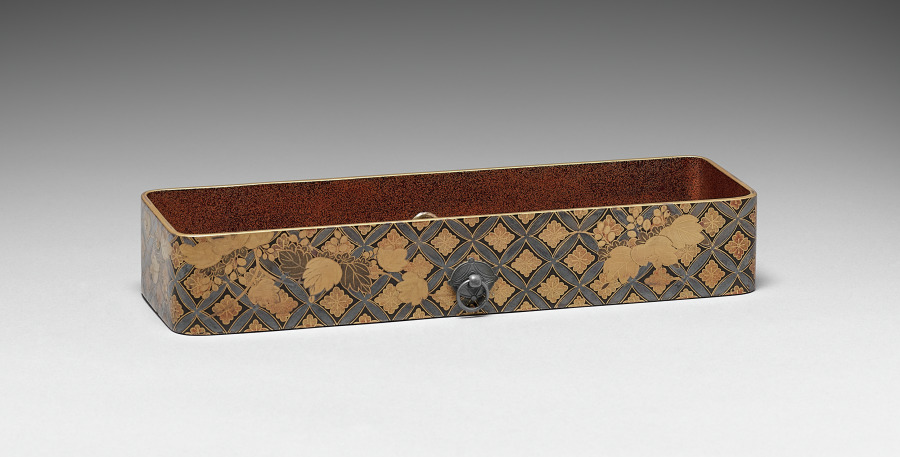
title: Letter Box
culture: Japan, Edo period (1615–1868)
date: 1615–1868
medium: lacquer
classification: Lacquer